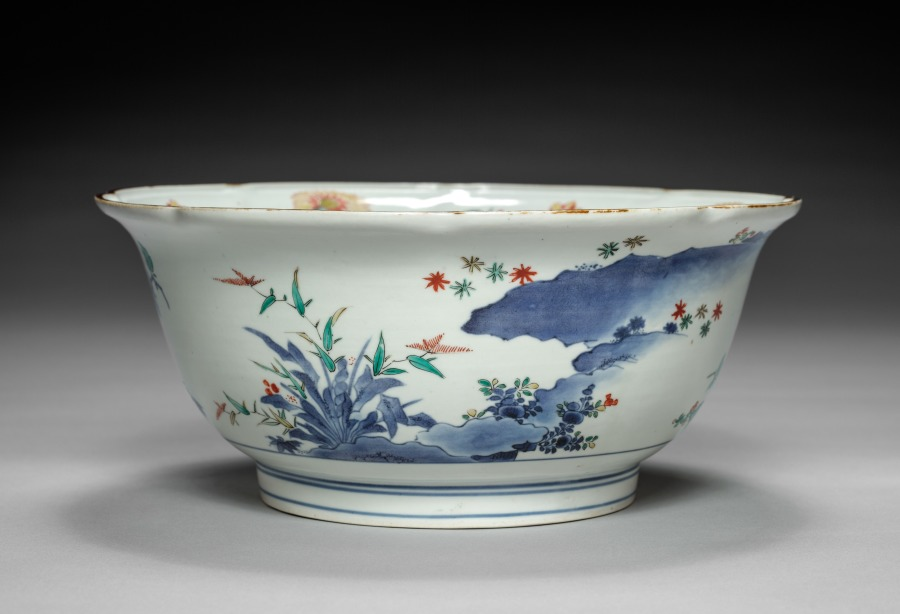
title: Bowl with Lion and Flowers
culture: Japan, Edo period (1615–1868)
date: 1700s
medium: porcelain, molded, with underglaze blue and overglaze color enamel (Hizen ware, Kakiemon type)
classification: Ceramic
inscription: 金